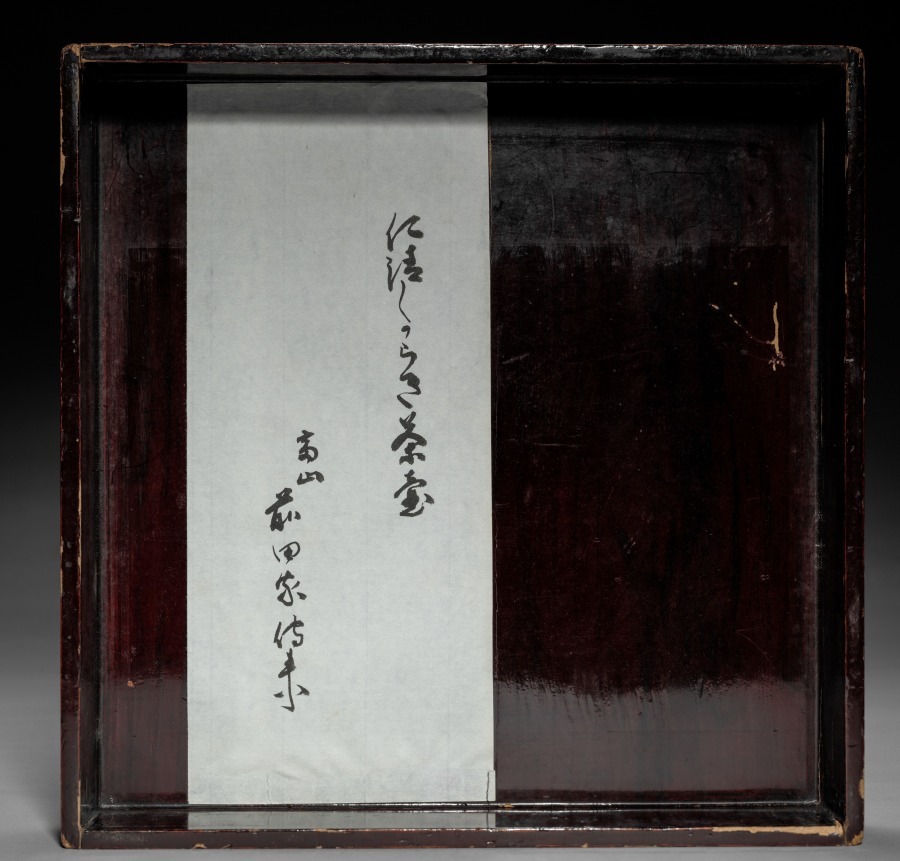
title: Tea Storage Jar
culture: Japan, Edo period (1615–1868)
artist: Nonomura Ninsei (Japanese, active 1640s–90s)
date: mid- to late 1600s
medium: Stoneware with white glaze (Shigaraki style)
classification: Ceramic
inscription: Ninsei seal impressed in the clay on bottom.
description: In this tea storage jar, Nonomura Ninsei reinterpreted a Shigaraki stoneware—made to hold agricultural products and known for its warm orange color, asymmetrical round forms, and irregular natural ash glazes—to produce a more refined piece that would appeal to tea masters seeking a touch of rusticity. In Japanese tea culture, hanging scroll paintings or calligraphy are placed in the tokonoma, or viewing alcove, for participants to admire and discuss along with the utensils used in the gathering. The scrolls are typically paired with vessels containing seasonal floral arrangements.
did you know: This jar may be considered an example of the aesthetic known as kireisabi, or refined rusticity.